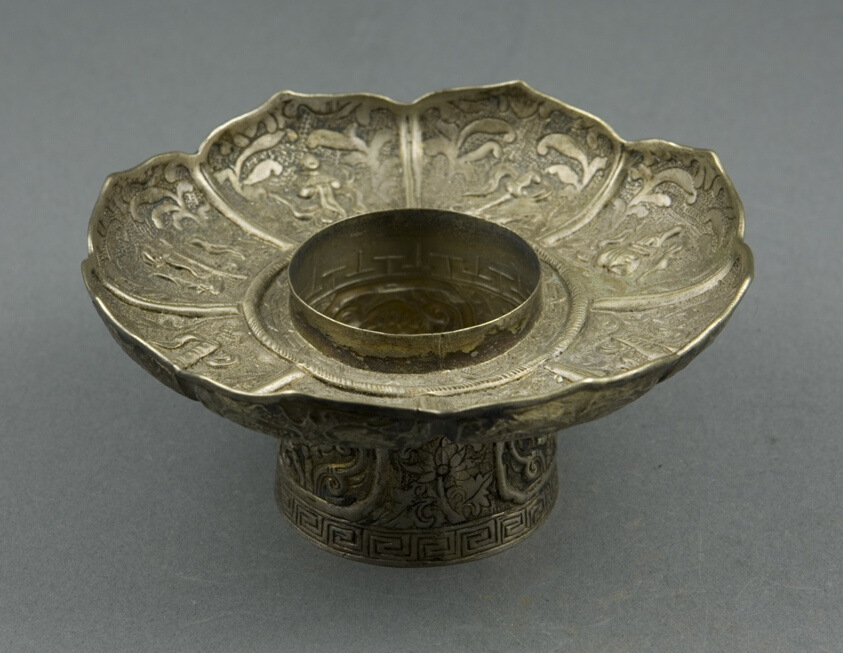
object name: Religious/Ritual Object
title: Lotus-Shaped Altar Bowl Stand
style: Himalayan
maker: Tibet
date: 18th century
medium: Silver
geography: Tibet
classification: ceremonial object; silver; metal; asian art; ritual objects